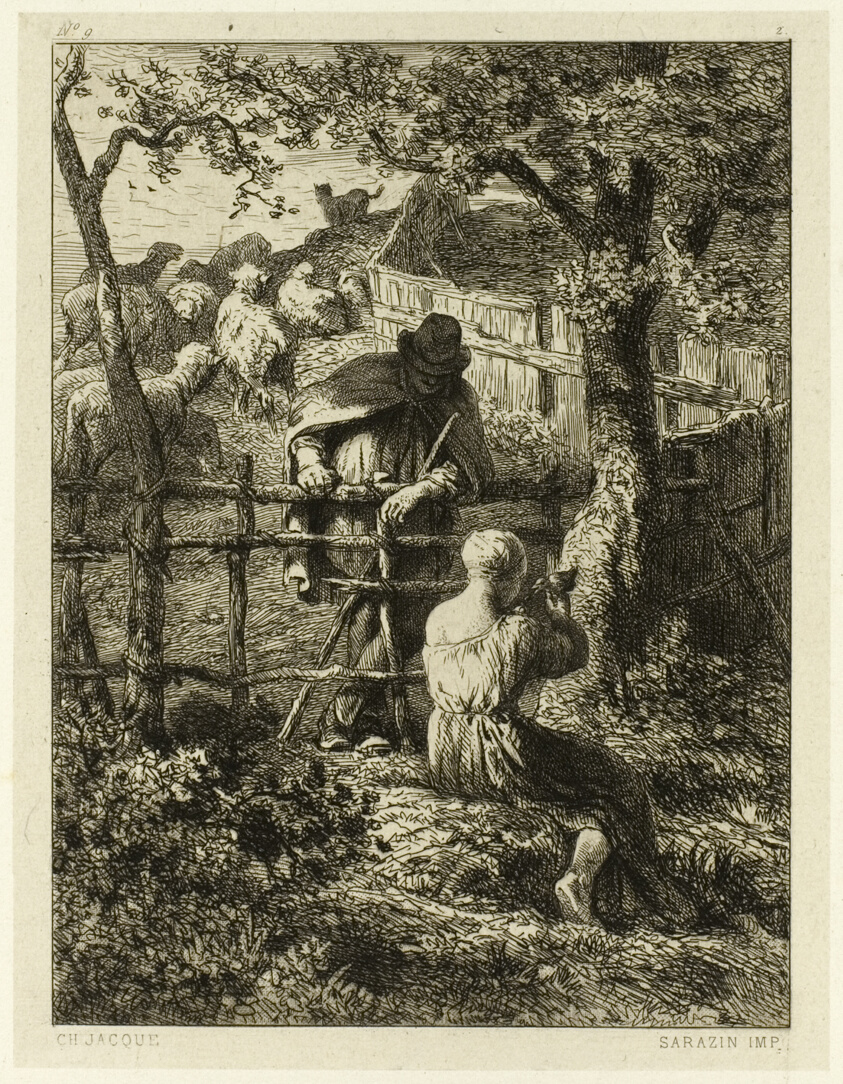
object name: Print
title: Summer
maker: Charles Émile Jacque (French, 1813-1894); printed by Sarazin (French, 19th century)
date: c. 1865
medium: Etching, engraving and roulette on cream China paper laid down on ivory wove paper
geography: France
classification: etching; print; prints and drawing